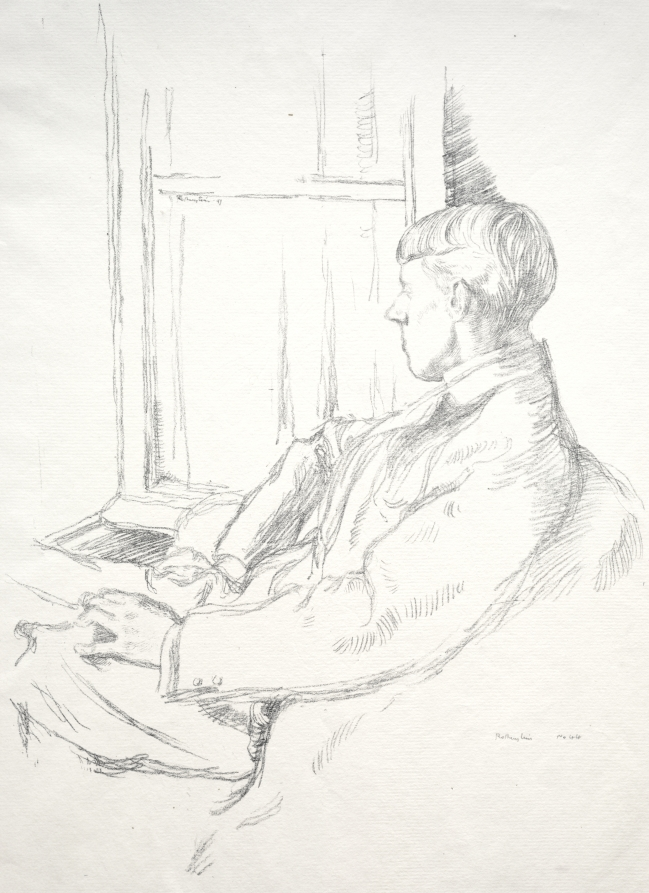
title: Aubrey Vincent Beardsley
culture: England, late 19th-early 20th century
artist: William Rothenstein (British, 1872–1945)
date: c. 1897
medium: lithograph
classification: Print